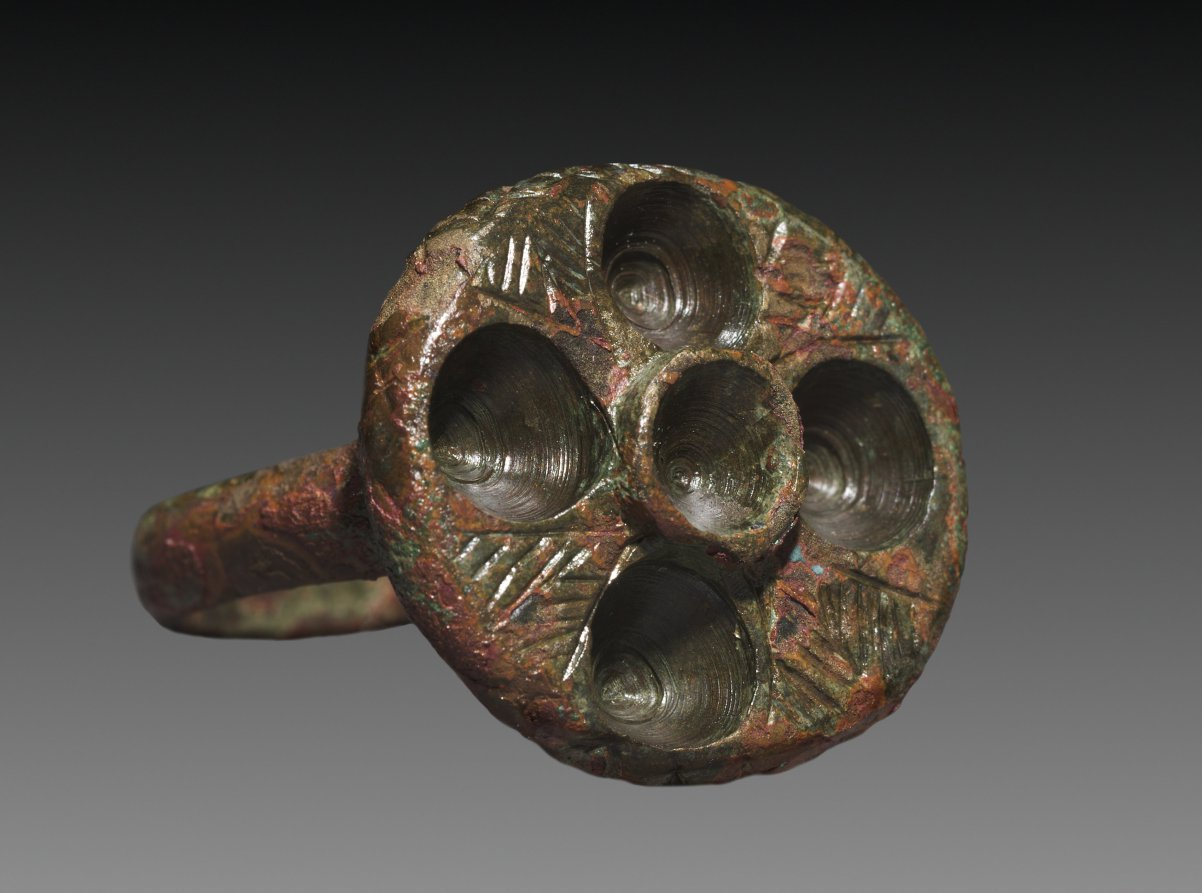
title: Ring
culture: Parthian Empire (247 BCE–224 CE)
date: 1–200 CE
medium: bronze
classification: Jewelry